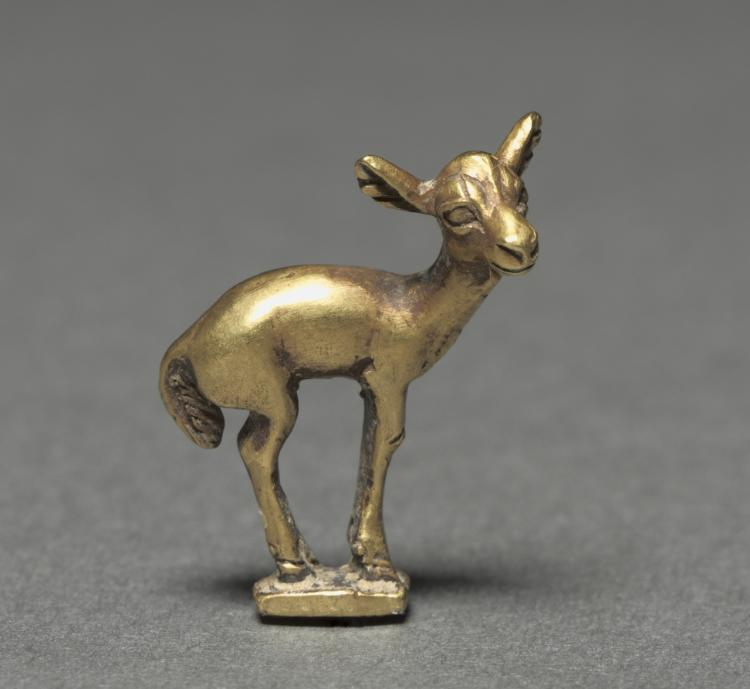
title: Elk Fawn Finial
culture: Western Asia, Scythian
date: 400–200 BCE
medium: gold, solid cast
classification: Sculpture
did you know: This artistically sensitive depiction of an elk fawn describes its features with great artistry, form harmonizing with function. Although a nomadic culture, the Scythians were noted as much for their virtuosity in metalwork as for their equestrian skills. Made of solid gold, this finial is an exquisite example of portable wealth.